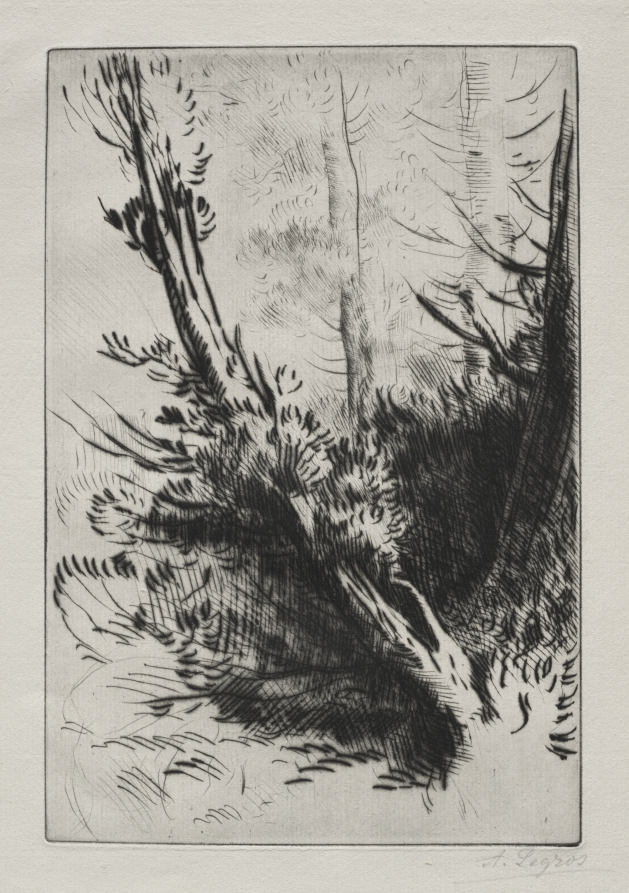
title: In the Woods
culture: France, 19th-20th century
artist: Alphonse Legros (French, 1837–1911)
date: c. 1857–1911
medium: etching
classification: Print